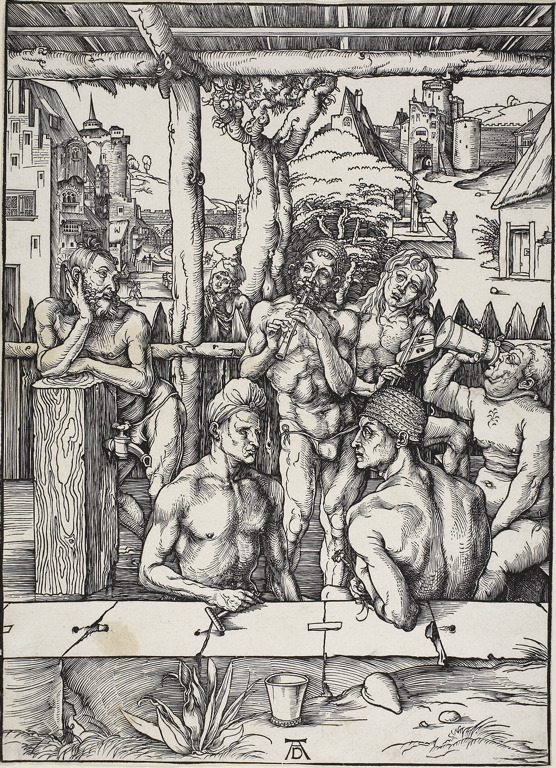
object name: Print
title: The Men's Bath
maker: Albrecht Dürer (German, 1471-1528)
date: 1496/97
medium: Woodcut in black on off-white laid paper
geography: Germany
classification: woodcut; print; prints and drawing; paper